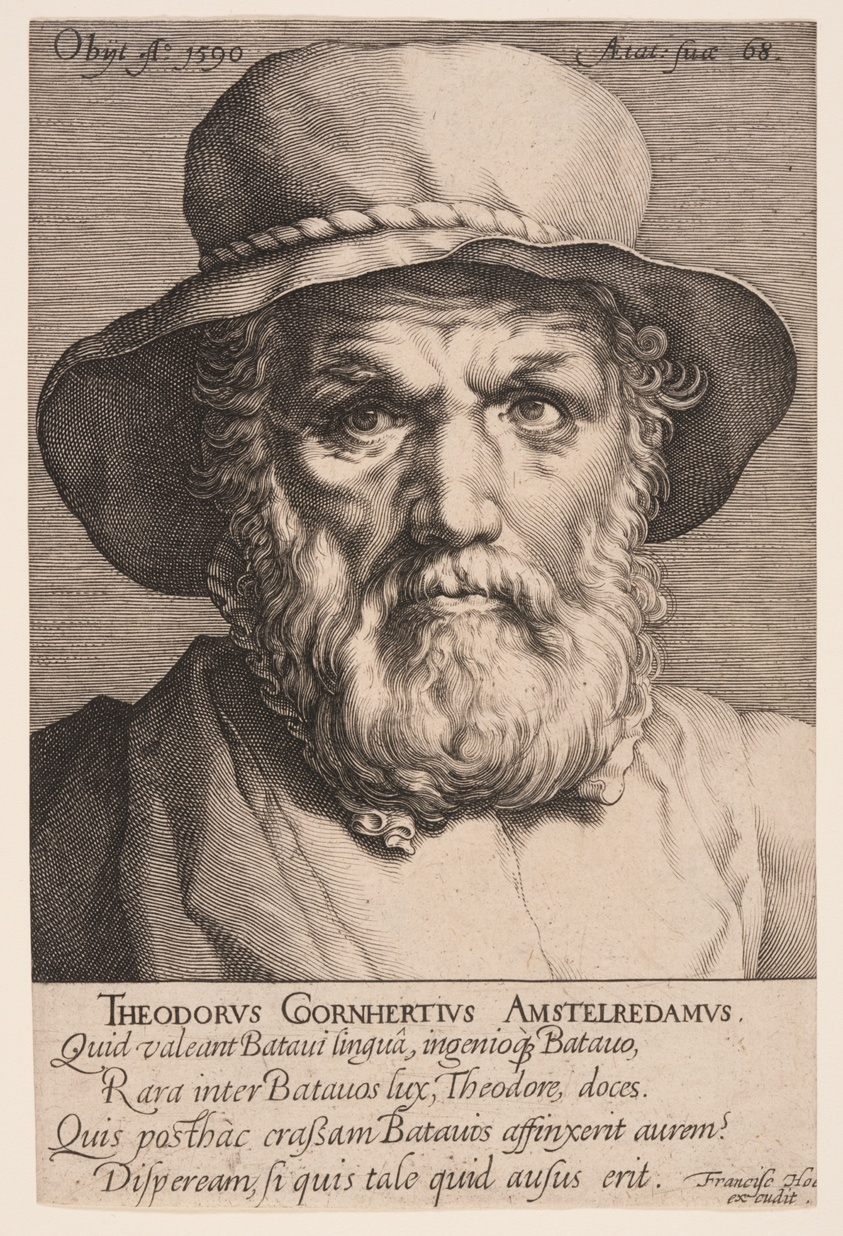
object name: Print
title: Dirck Volkertsz. Coornhert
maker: Jan Harmensz Muller; Dutch, 1571–1628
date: 1590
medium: Engraving on laid paper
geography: Netherlands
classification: print; engraving; paper; prints and drawing